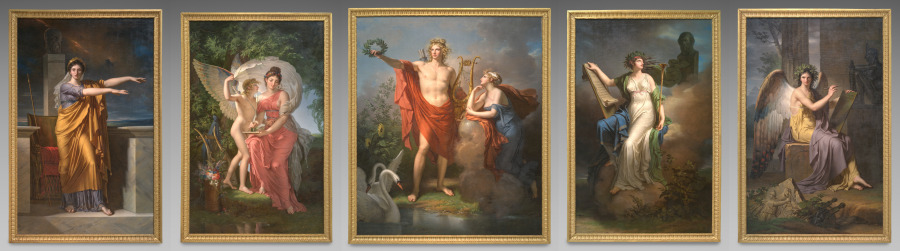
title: Polyhymnia, Muse of Eloquence; Erato, Muse of Lyrical Poetry; Apollo, God of Light, Eloquence, Poetry and the Fine Arts with Urania, Muse of Astronomy; Calliope, Muse of Epic Poetry; Clio, Muse of History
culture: France, late 18th-early 19th century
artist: Charles Meynier (French, 1768–1832)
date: 1800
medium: oil on canvas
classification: Painting